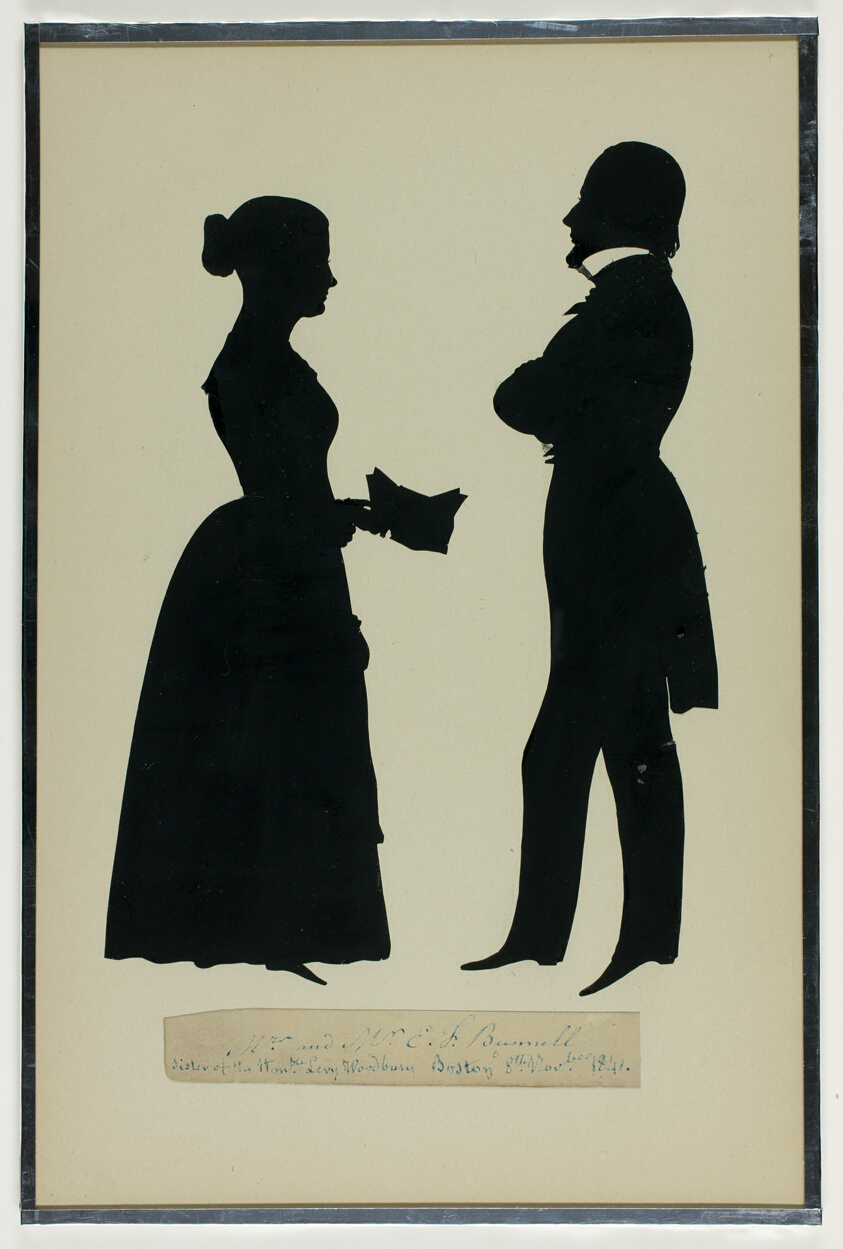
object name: Drawing and Watercolor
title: Mr. & Mrs. E. F. Bunnell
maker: Auguste Edouart (French, 1789-1861)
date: November 8, 1841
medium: Cut paper silhouette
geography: France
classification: silhouette; prints and drawing; paper